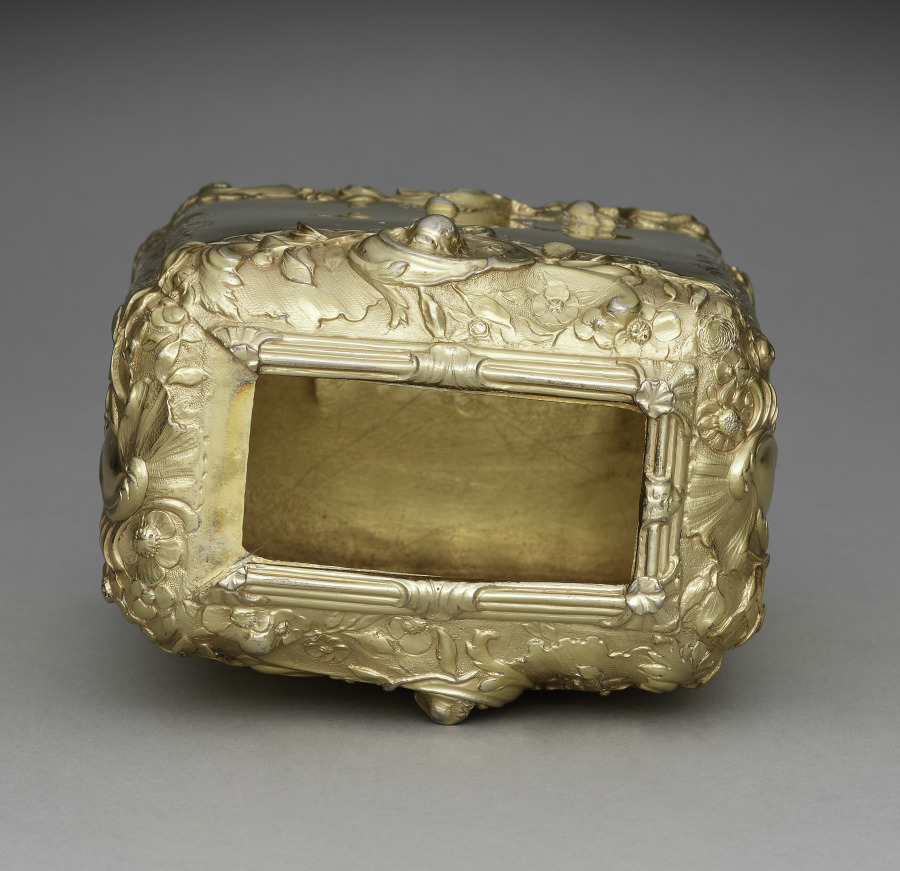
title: Tea Caddy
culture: England, London, 18th century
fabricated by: Paul Jacques de Lamerie (British, 1688–1751)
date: 1741–1742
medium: silver gilt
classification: Silver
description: In the 1600s and 1700s, silver played a significant role in projecting wealth, status, power, and ritual in British life. Tea was likewise a highly valued commodity, and as such, silver caddies like this one were designed to display the social distinction of its owner. This canister’s prominently sloping shoulders were designed by Paul Jacques de Lamerie in the early 1730s and became a standard form for tea caddies by the end of the decade.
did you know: This tea caddy is accompanied by a lid. See cover record.